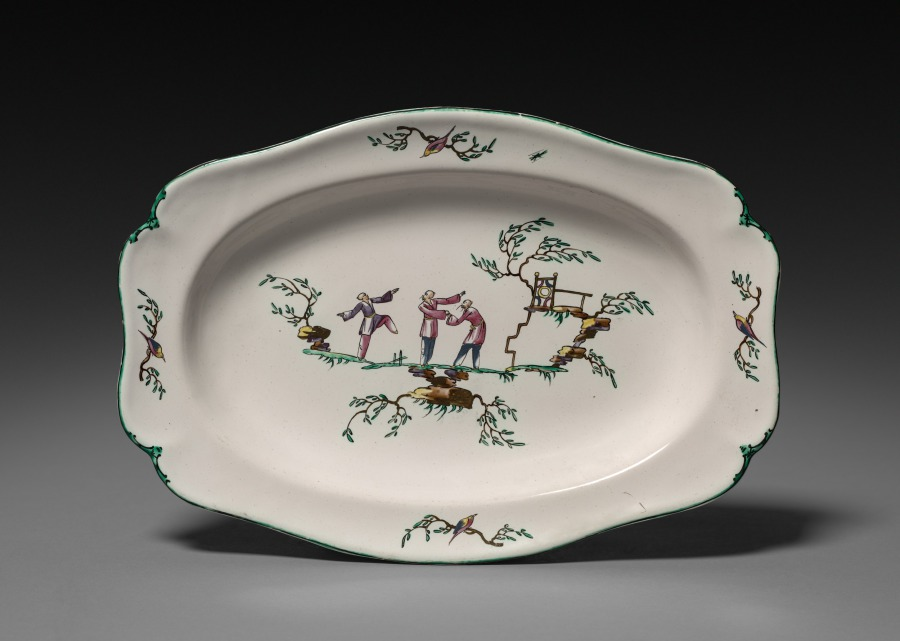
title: Platter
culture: France, Marseilles, 18th century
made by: Veuve Perrin Factory (French)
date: c. 1765–1775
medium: faience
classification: Ceramic